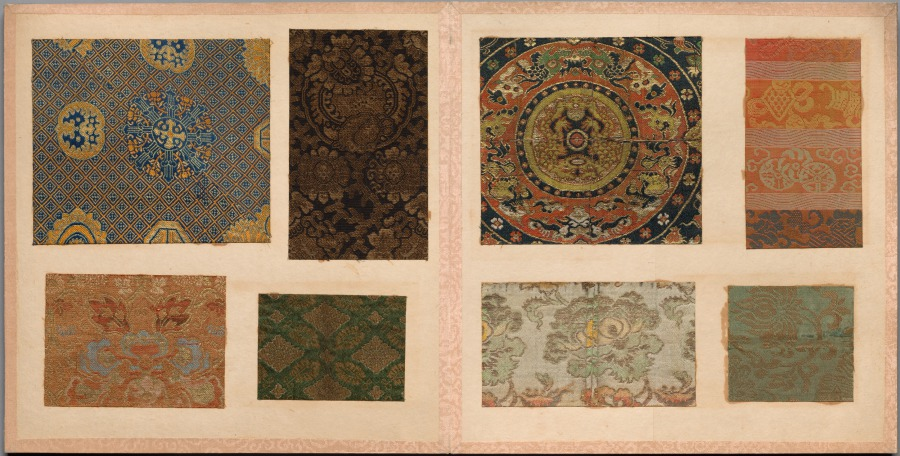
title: Album of Textile Samples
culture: Japan and China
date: 1700s–1800s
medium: silk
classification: Textile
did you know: This album has 26 pages containing 128 mounted Chinese or Japanese textile samples.